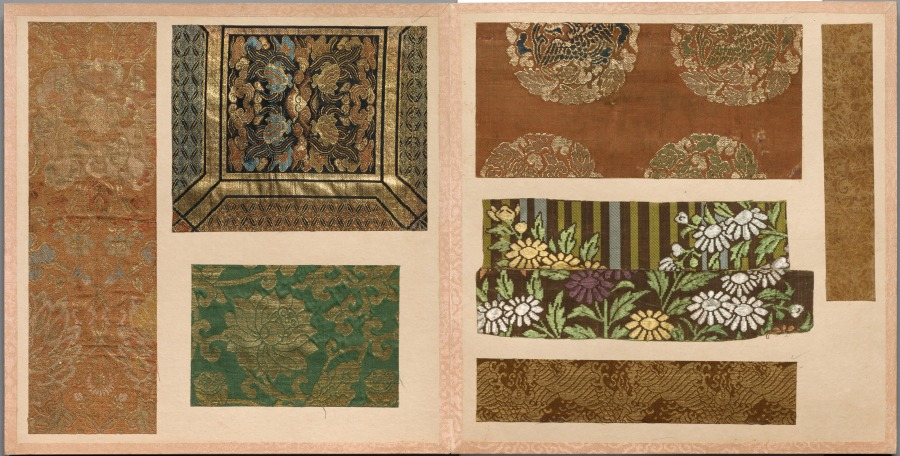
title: Album of Textile Samples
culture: Japan and China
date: 1700s–1800s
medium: silk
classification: Textile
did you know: This album has 26 pages containing 128 mounted Chinese or Japanese textile samples.